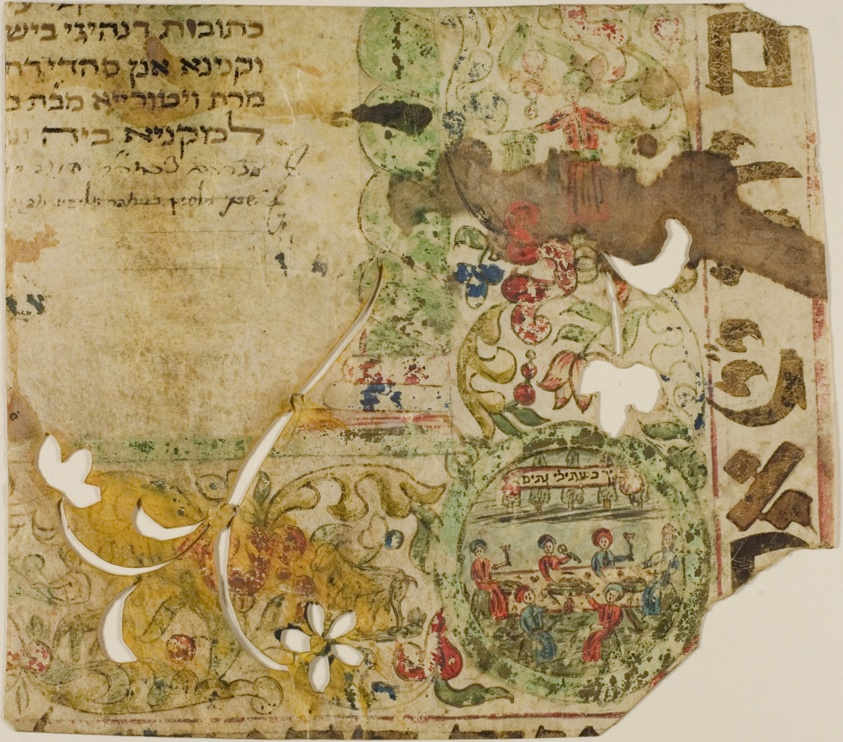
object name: Drawing and Watercolor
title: Illuminated Jewish Marriage Contract Fragment in Aramaic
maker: Italian, 18th century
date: 18th century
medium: Manuscript cutting in tempera and colored inks, with floral cutouts, and Hebraic inscriptions in brown and black inks, on vellum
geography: Italy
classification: tempera; drawings (visual works); prints and drawing